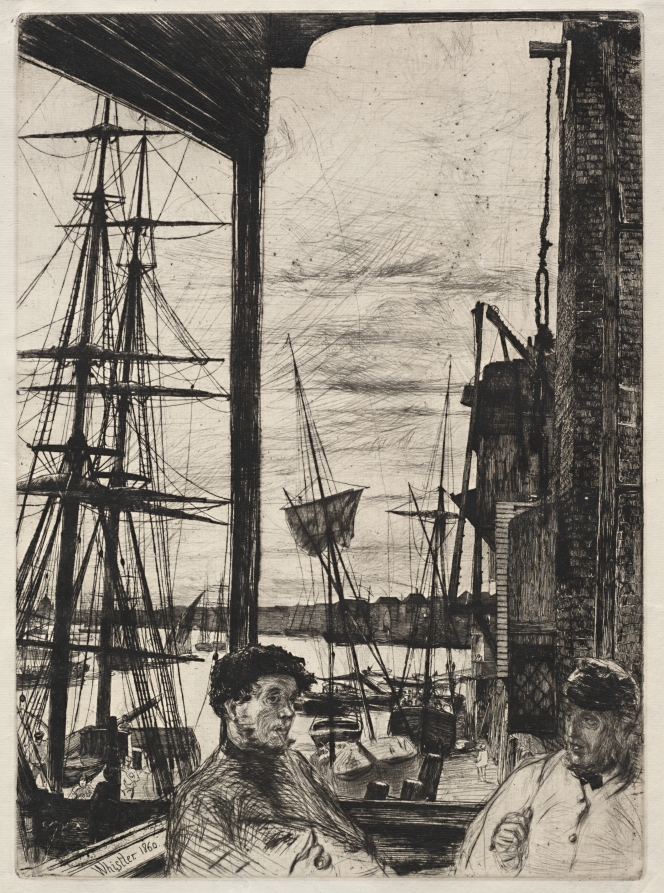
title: Rotherhite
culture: America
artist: James McNeill Whistler (American, 1834–1903)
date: 1860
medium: etching and drypoint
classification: Print